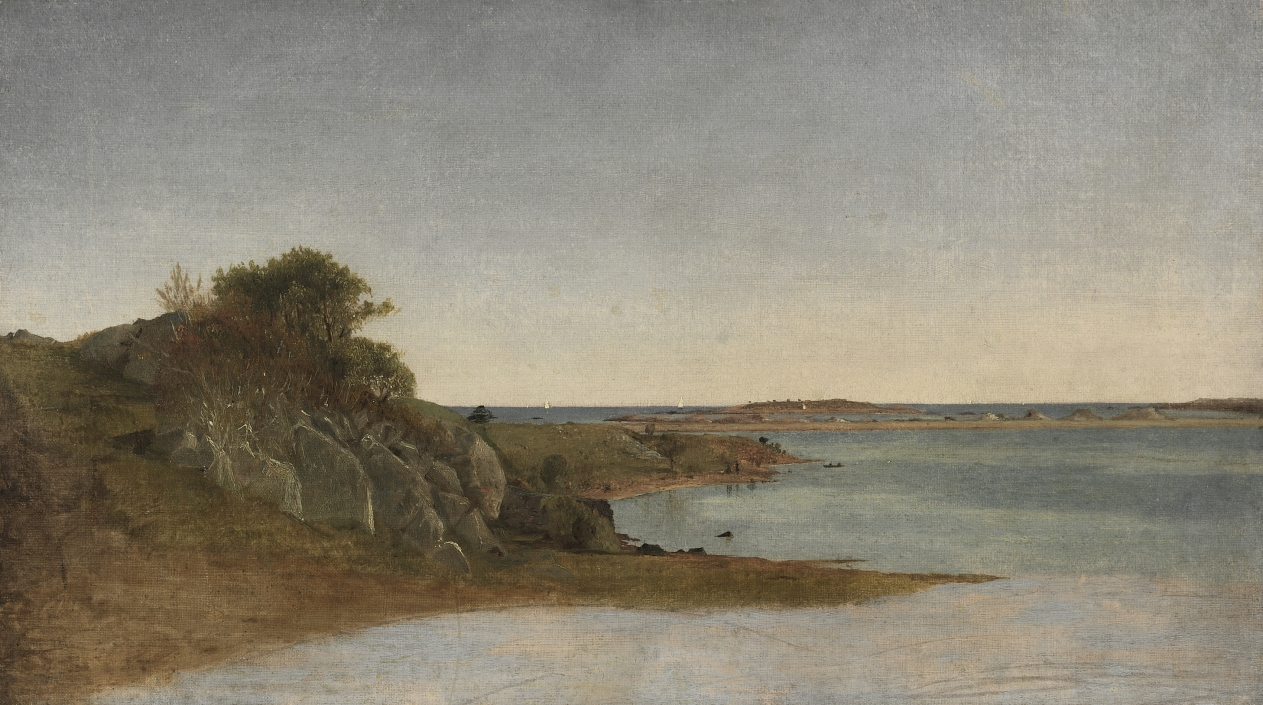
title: View near Newport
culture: America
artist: John Frederick Kensett (American, 1816–1872)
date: 1860s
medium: oil on canvas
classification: Painting